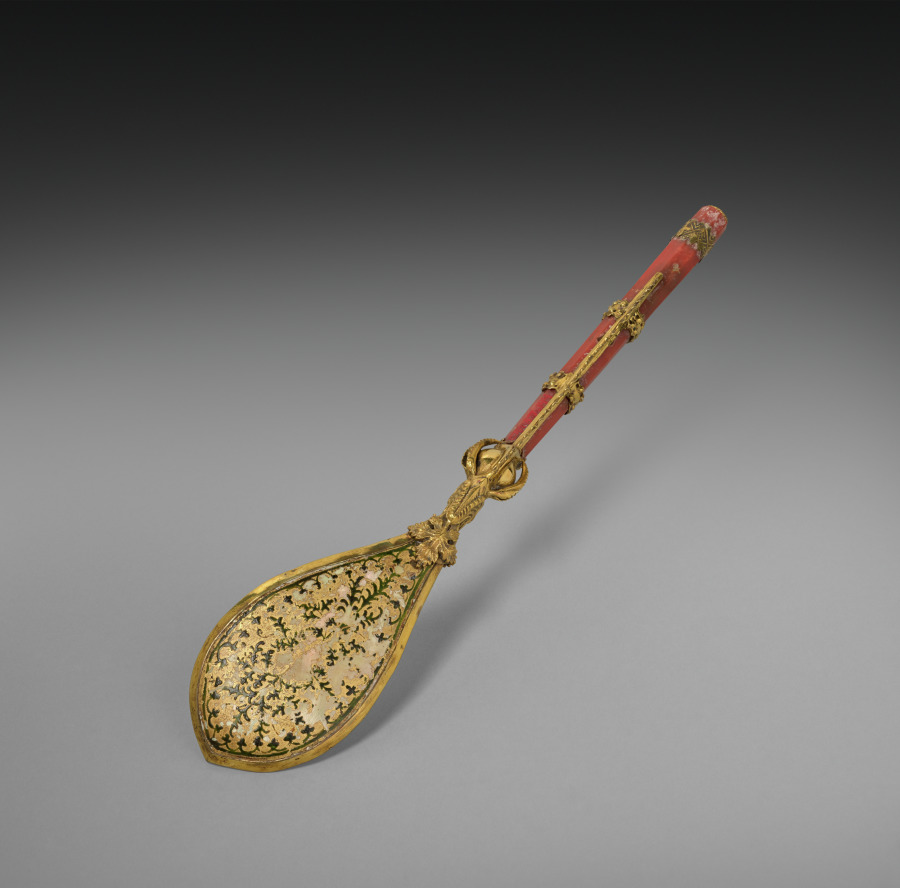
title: Spoon with Detachable Pick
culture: Italy, Venice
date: c. 1500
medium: enameled shell and coral, gilt-silver mounts; detachable pick with dragon's head finial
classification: Metalwork